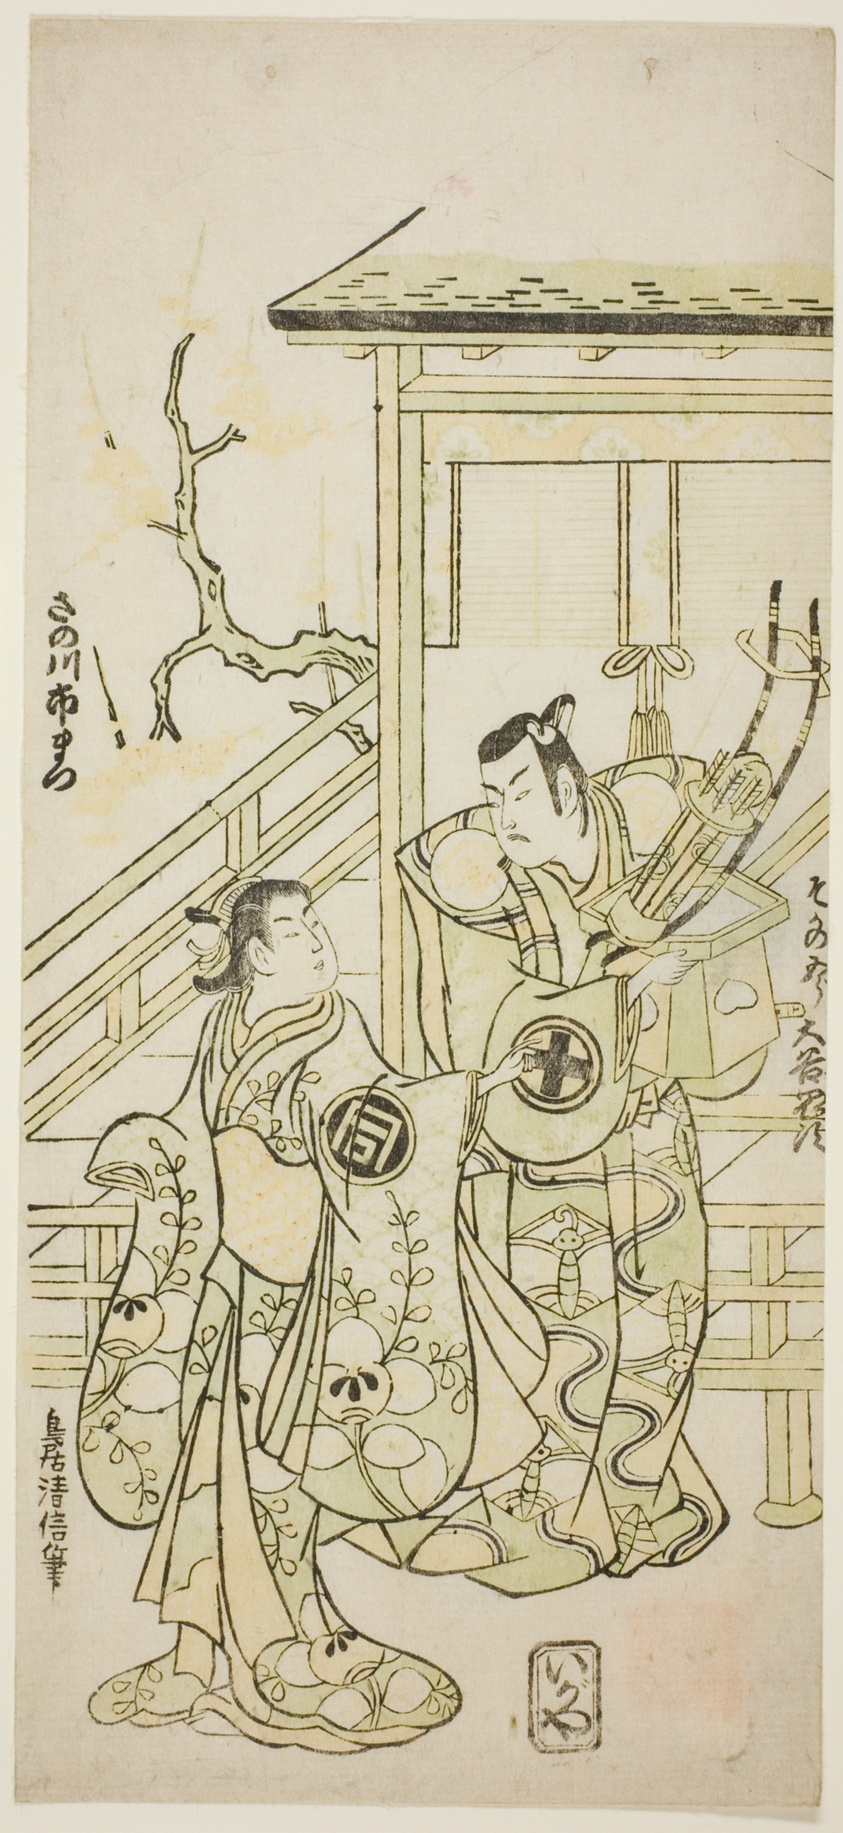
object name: Print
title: The Actors Otani Oniji I as Soga no Goro and Sanogawa Ichimatsu I as the sister of Yoshinaka in the play "Fuji no Yuki Mitsugi Soga," performed at the Nakamura Theater in the first month, 1746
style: Japanese (culture or style)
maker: Torii Kiyonobu II (Japanese, active c. 1725-61)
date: 1746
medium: Color woodblock print; hosoban, benizuri-e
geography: Japan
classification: woodblock print; print; asian art